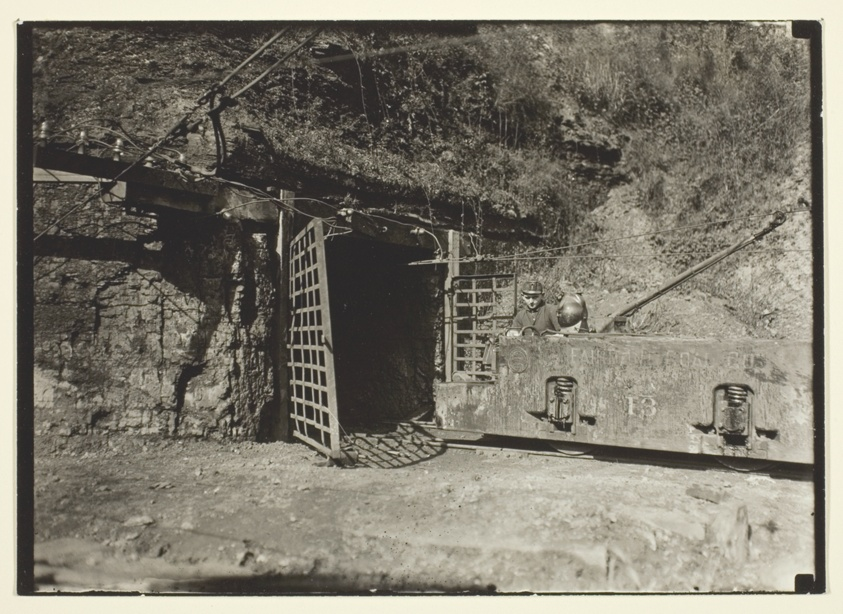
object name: Photograph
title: Motor for Coal Train, West Virginia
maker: Lewis Wickes Hine (American, 1874–1940)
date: 1909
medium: Gelatin silver print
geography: United States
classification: gelatin silver (developing-out-paper) pr; photographic process; photography; photograph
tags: Collected by Hugh Edwards, documentary